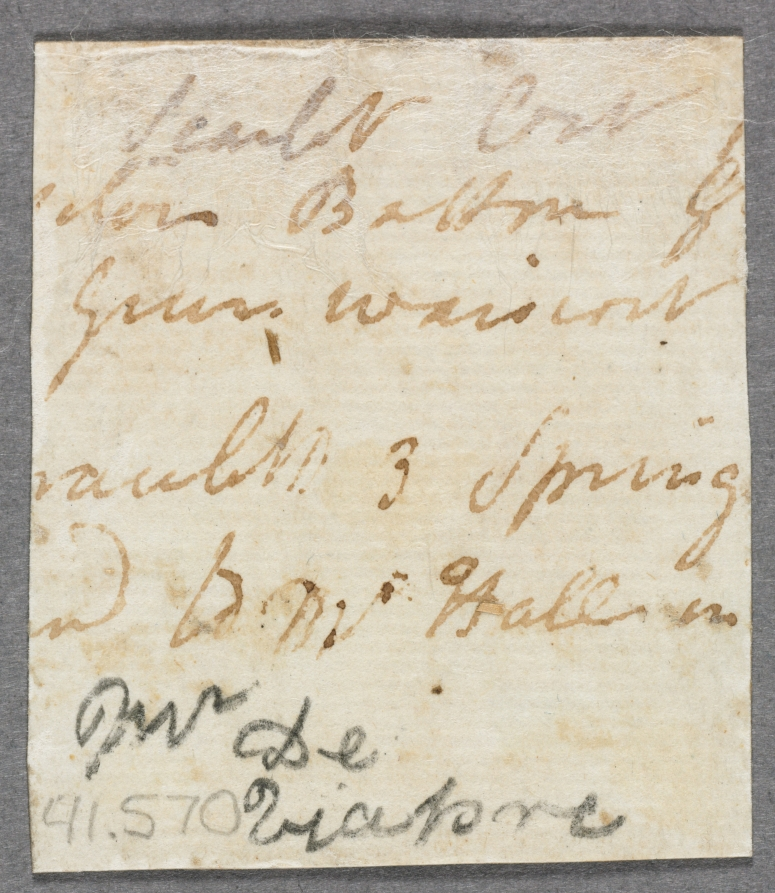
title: Portrait of M. de Viapre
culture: England, 18th century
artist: John I Smart (British, 1741–1811)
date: c. 1776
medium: graphite and wash on laid paper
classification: Portrait Miniature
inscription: Signature: none; inscribed on paper backing in graphite, upside down at upper left: 196; also on paper backing on slant at center, in graphite: Sir ?/John/Lester and 11; inscribed on back of drawing, under paper backing in graphite at bottom: Mr De [G?]iaf . . .; and in brown ink from top to bottom: Scarlet Coat . . . der Bottom [or possibly button]. . . green waistcoat . . . racelet & Spring [deli]vrd to Mr. Hall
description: Although it is impossible to say if it was always part of the artist’s process to execute a preparatory sketch prior to painting each miniature, we do know that John Smart retained many hundreds of these sketches. A group of preparatory sketches—of which this portrait is one—descended through the Smirke family after Smart’s daughter Sarah gave a sketchbook containing preparatory portrait studies to her friend Mary Smirke, sister of the celebrated Victorian architect Sydney Smirke. This book was probably broken up around 1877 when it was divided between Sydney’s daughters Mary Jemmett and Mrs. Lange, whose portions were both sold at auction in 1928. G. C. Williamson was the first to suggest that Smart’s sketches were well known and that they were preparatory studies for the painted miniatures. Williamson listed the names of sitters from the sketches known to him at the time, and they include Sir John Lester, the title formerly given to the sketch here. This designation was applied only to a paper backing that had been attached after the drawing had been removed from the sketchbook. There is no further evidence for this attribution, however. This sketch presents only the sitter’s head, with a slight suggestion of a high stock collar. His head faces to the left, and his light hair is combed straight back with a flat curl above the right ear. He has gray eyes, and the background is unpainted. The work can be dated to around 1776 because of its size, which, when painted on ivory, would have been around 2 inches high. An inscription on the back of the drawing was discovered when the paper backing was removed in 1993. It is a fragment of a larger inscription, from which it has been cut. It is partly illegible but suggests that the work was intended to be set in a bracelet, and it gives some information about how the sitter was to appear in the finished miniature, including the description “scarlet coat . . . green waistcoat.” This combination of colors might seem almost flashy, but it appears elsewhere in Smart’s work. These details seem to have been written in Smart’s hand, while the graphite inscription below—“Mr. De [?]”—was probably written later in another hand. Miniatures expert Arthur Jaffé remarked in 1948 that this portrait probably depicted John Lester of Poole, Dorset, who was knighted in 1802. However, this identity was based solely on the inscription on the later paper backing that Jaffé did not have the opportunity to see removed to reveal the inscription in Smart’s hand on the back of the drawing itself. There are no portraits of Sir John Lester known, and to this date, the finished ivory for which this preparatory sketch was presumably undertaken has not been discovered.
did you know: Sketches helped John Smart work out the particulars of a portrait before commencing the miniature on ivory; they were useful in the event that a duplicate might later be required.